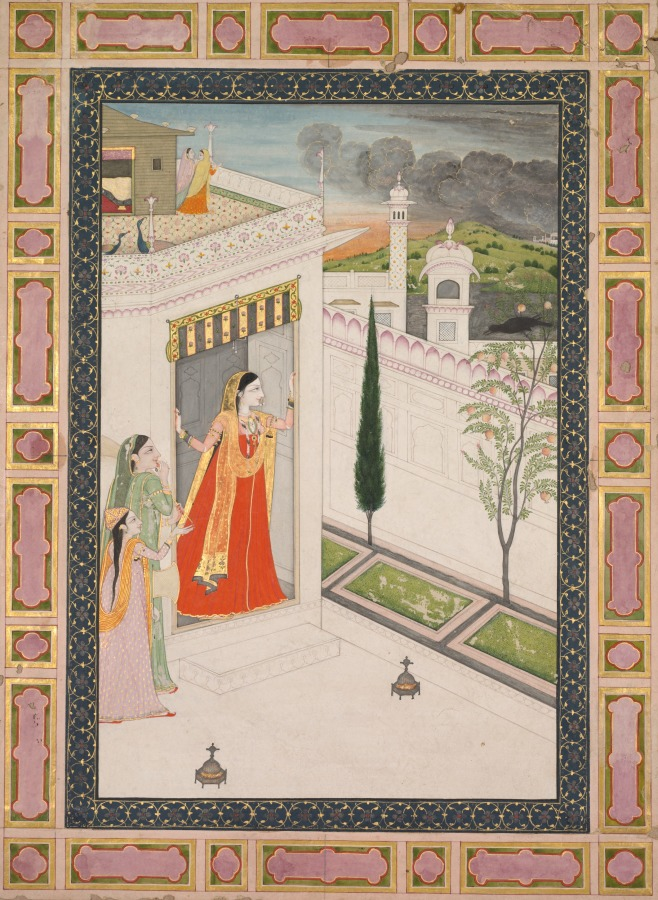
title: Augury of the crow (Vasakasajja Nayika)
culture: Northern India, Pahari kingdoms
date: c. 1800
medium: Gum tempera and gold on paper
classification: Painting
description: The heroine in the doorway is waiting for her husband to return, but he is delayed, and ominous monsoon clouds gather in the distance. The pomegranate tree in her garden has ripe fruits replete with seeds and bright red juices, suggestive of her fertility, but a crow is perched there. The sound of a crow’s voice is an unlucky omen, and this further compounds her anxiety. Depictions of tense, relatable situations were made to elicit empathy in the viewer and emotions that heightened the pleasure of viewing and savoring paintings.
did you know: Nayika is the term for a heroine figure in Indian art, literature, and drama.